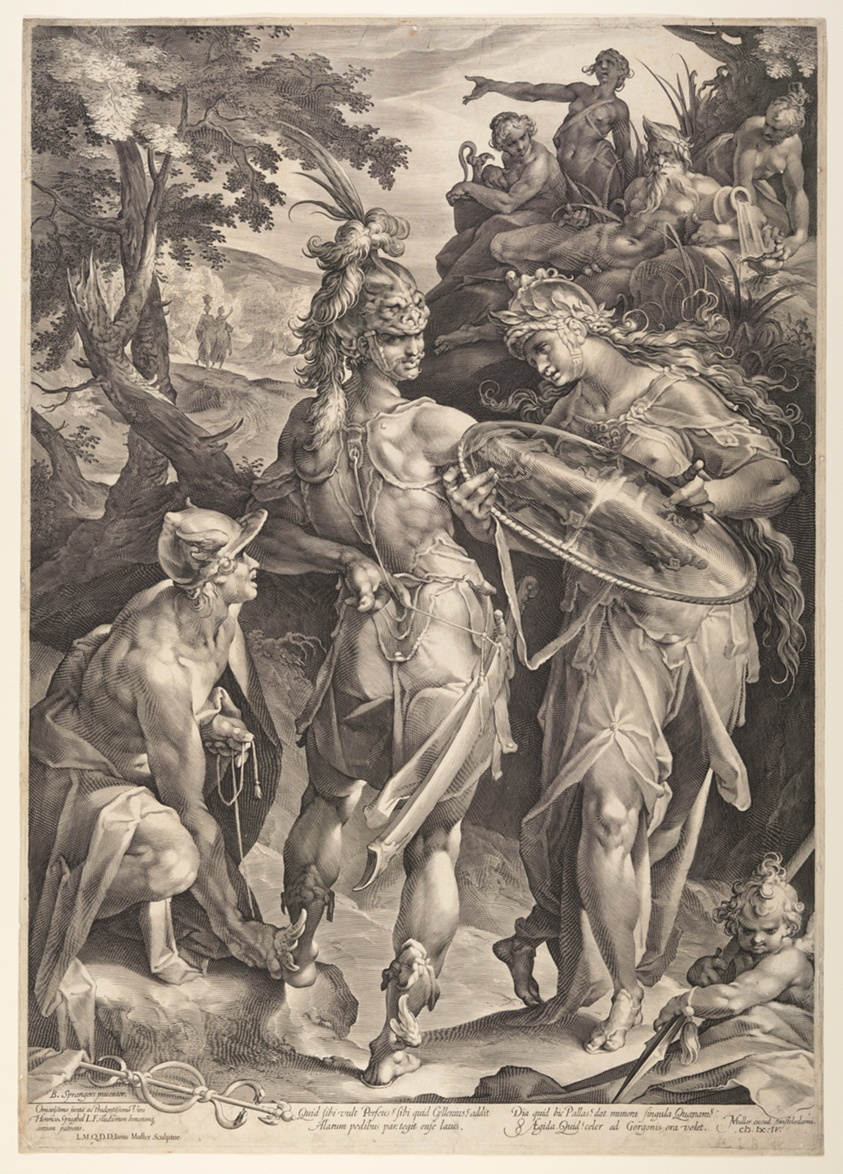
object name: Print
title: Minerva Arming Perseus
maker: Jan Harmensz Muller (Dutch, 1571–1628); Bartholomeus Spranger (Flemish, 1546–1611)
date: 1604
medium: Engraving on ivory laid paper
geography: Netherlands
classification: engraving; paper; print; prints and drawing